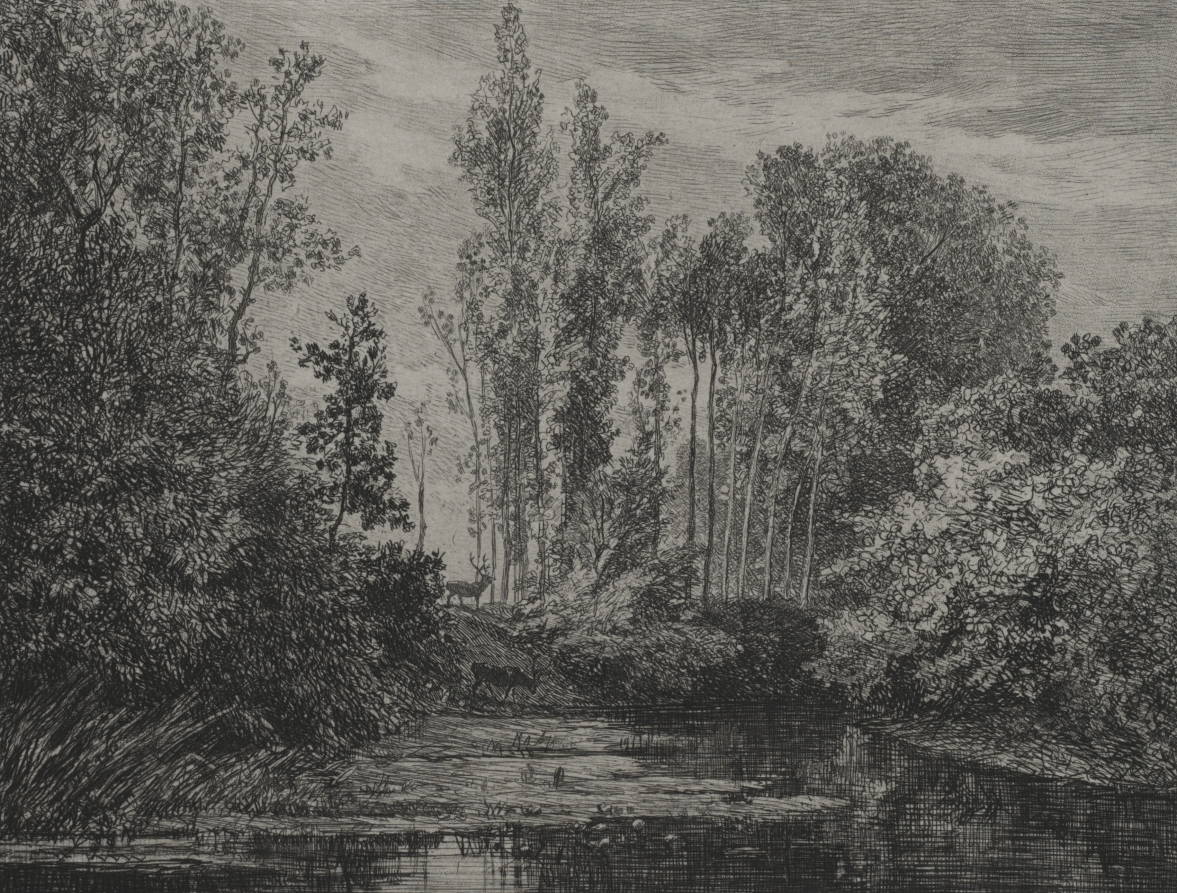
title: Stags at the water's edge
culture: France, 19th century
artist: Charles François Daubigny (French, 1817–1878)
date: 1850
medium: etching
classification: Print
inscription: signed, lower left, in plate: Daubigny; lower right, in plate: Imp. par Delâtre Faubourg Poissonnière 145 Paris; upper right corner, in plate: 19